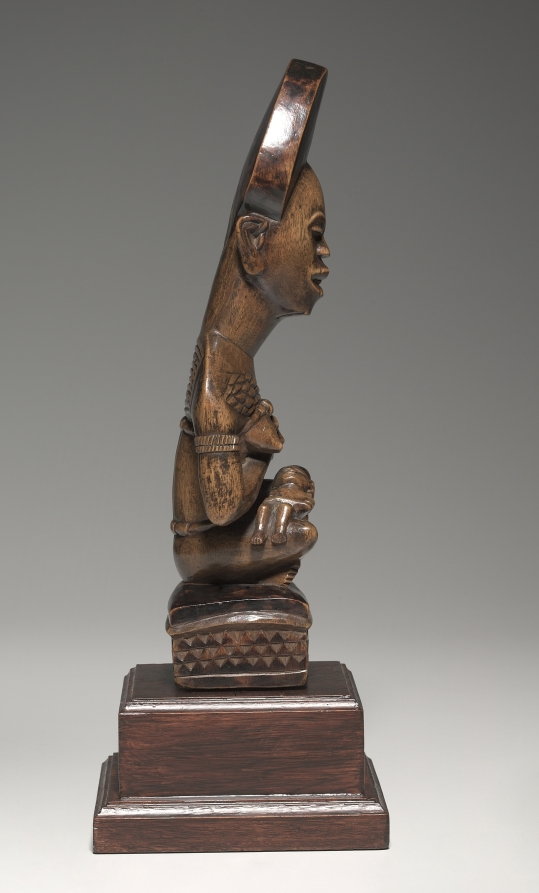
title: Woman and Child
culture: Africa, Central Africa, Democratic Republic of Congo, Yombe-style carver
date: mid- to late 1800s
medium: Wood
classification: Sculpture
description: This mother-and-child figure was probably part of a cult concerned with the treatment of infertility. Both her jewelry and her seated pose indicate that the woman occupied a high rank in her community. Her miter-shaped hairstyle, chiseled teeth, and raised body scars--considered to be marks of beauty and perfection--signal that the woman incarnates the founding ancestor of a kinship group.